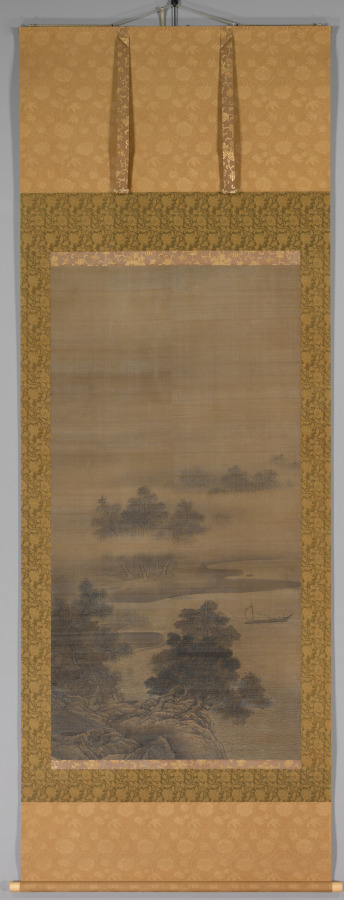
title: Returning Sails off a Distant Shore, from Eight Views of Xiao-Xiang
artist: follower of Sesshū Tōyō (Japanese, 1420–1506)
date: 1460s to 1550s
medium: Hanging scroll from a set of eight; ink and color on silk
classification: Painting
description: This painting and CMA 2015.590 belong to a group that was likely mounted as a pair of four-panel folding screens focusing on the Eight Views of Xiao-Xiang, a theme centered on an area in southern China. This one represents the motif “Returning Sails Off a Distant Shore.” Both emulate the style of Chinese painter Li Tang (about 1050–after 1130). Some scholars believe the paintings are the work of Sesshū Tōyō (1420–1506), the only Japanese painter of his day to have traveled to China.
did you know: Other paintings from the same set are in the collections of the Rhode Island School of Design and the Philadelphia Museum of Art.